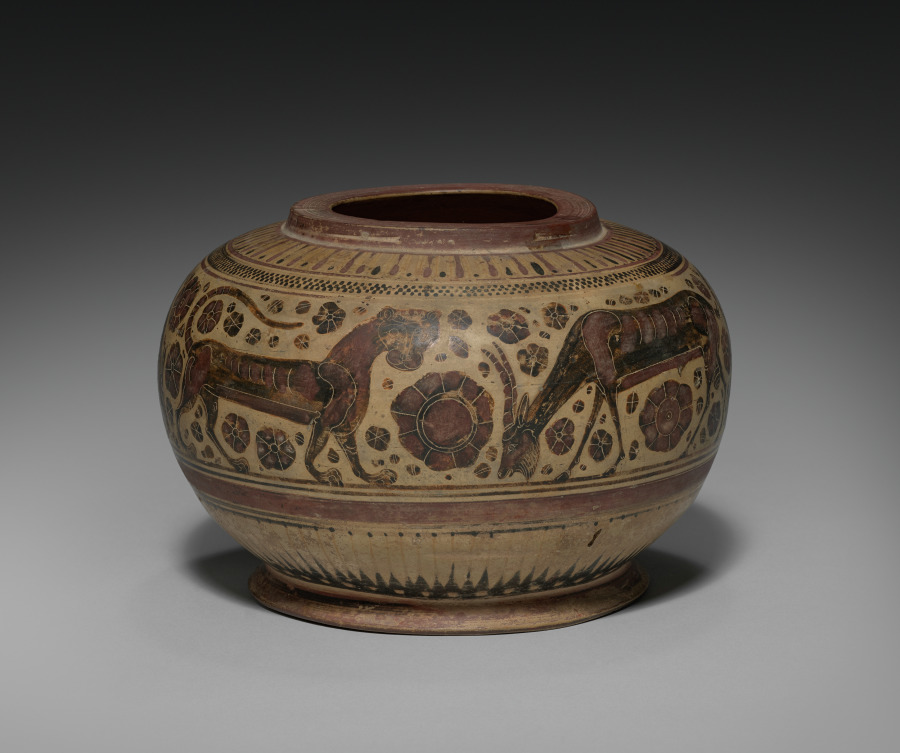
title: Corinthian Vase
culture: Greece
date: 600s BCE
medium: earthenware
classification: Ceramic